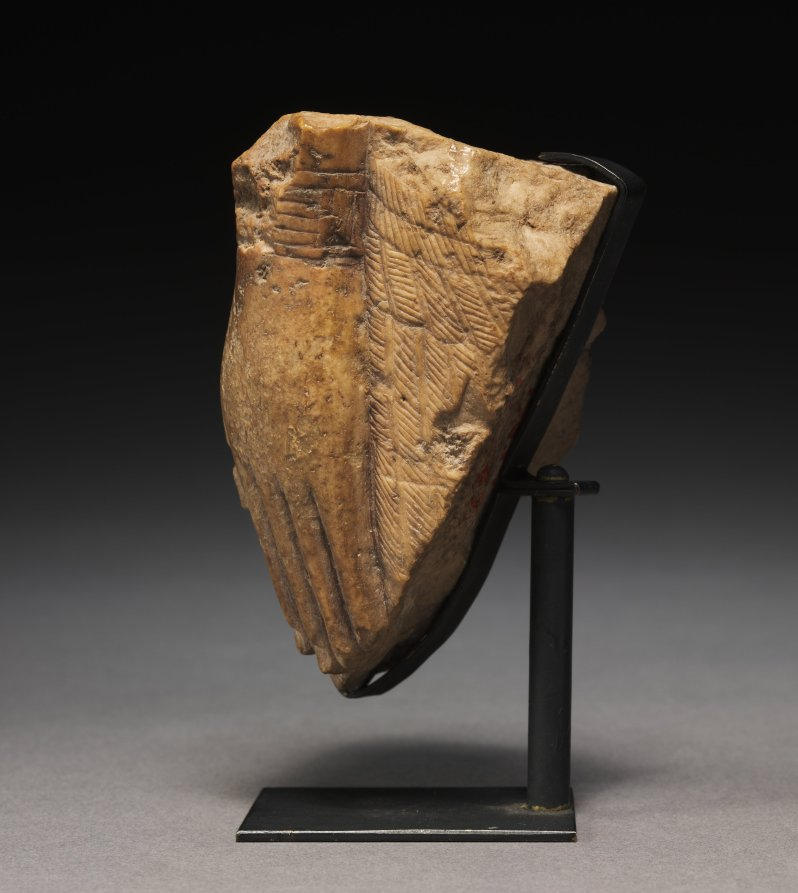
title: Fragment of a Feather-Garmented Figure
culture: Egypt, New Kingdom (1540–1069 BCE)–Third Intermediate (1069–715 BCE)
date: 1540–715 BCE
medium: limestone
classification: Sculpture